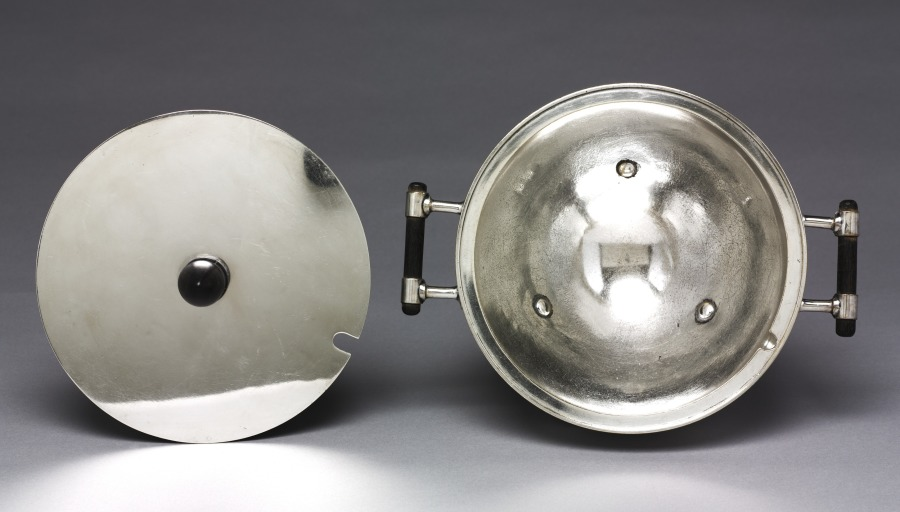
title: Covered Tureen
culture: England, 19th century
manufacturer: Hukin & Heath (British)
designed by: Christopher Dresser (British, 1834–1904)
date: c. 1880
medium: silver plated metal, ebony handles and knop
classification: Metalwork